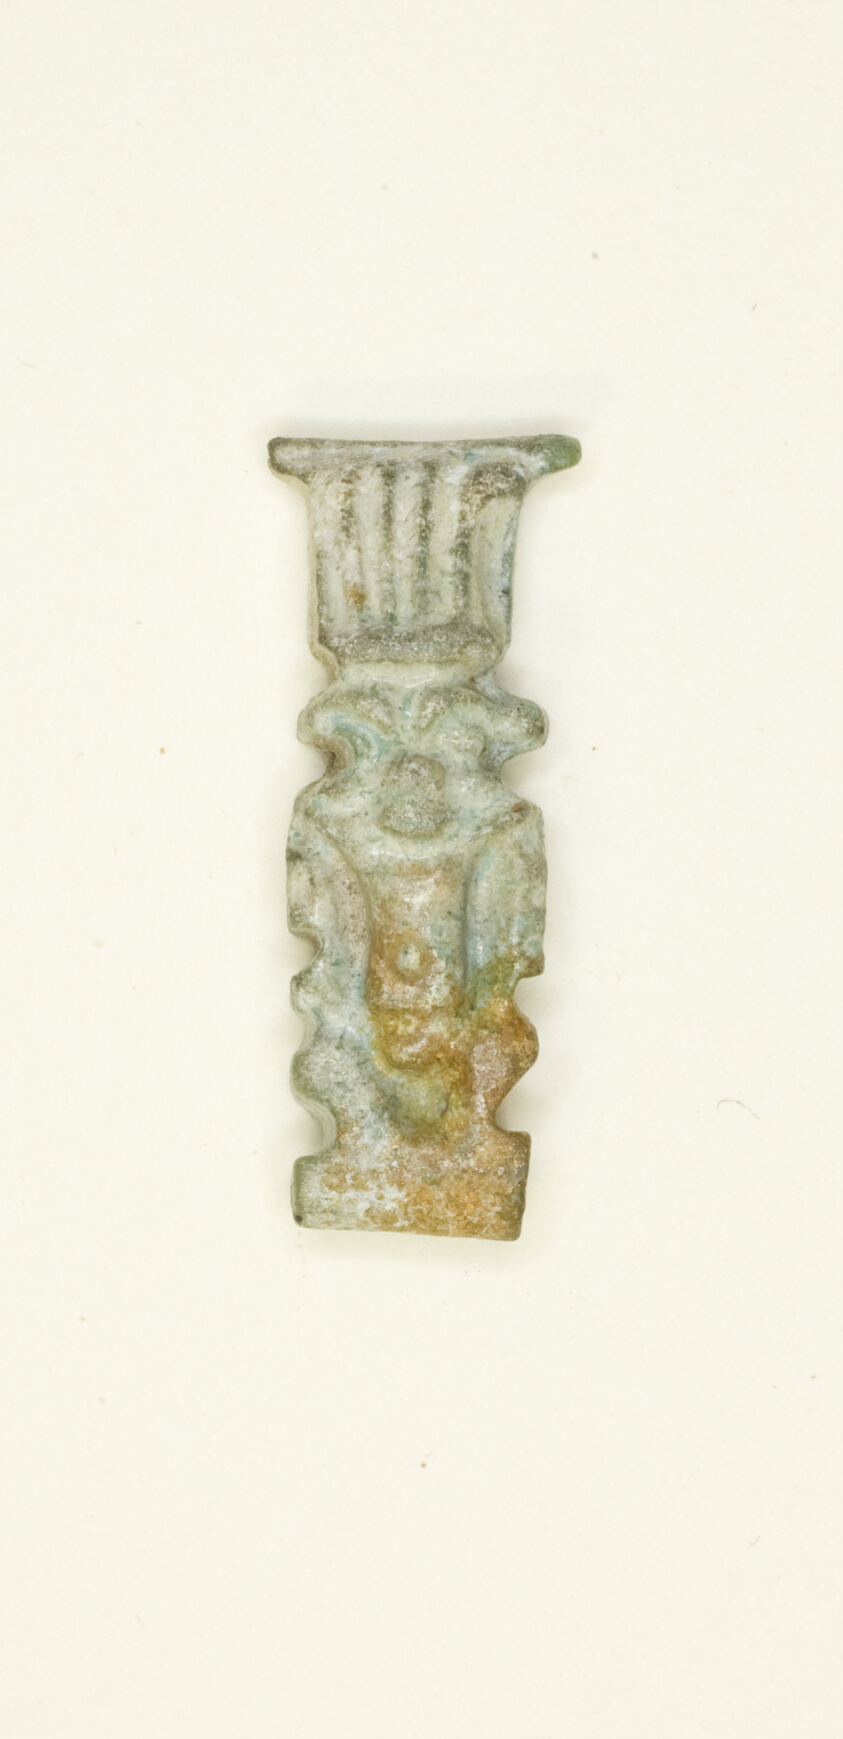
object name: Costume and Accessories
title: Amulet of the God Bes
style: egyptian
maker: Egyptian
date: Late Period, Dynasty 26–31 (664–332 BCE)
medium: Faience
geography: Egypt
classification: amulet; jewelry; ceramics; ancient art; costume; faïence (composite material)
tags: gods (deities)